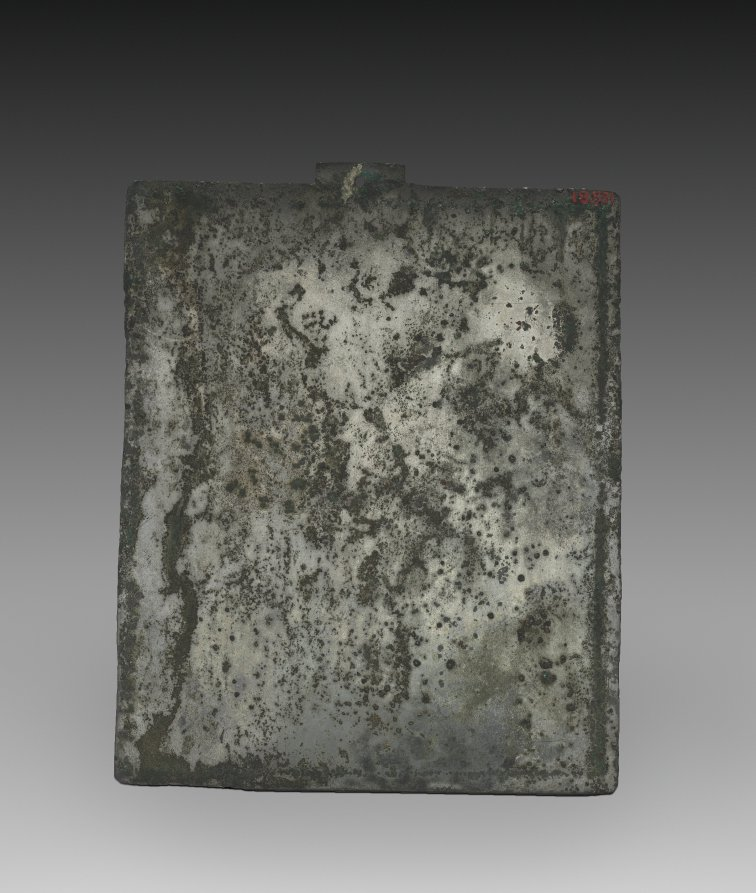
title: Mirror with the Image of Avalokitesvara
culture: Korea, Joseon dynasty (1392–1910)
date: early 1900s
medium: bronze with incised Buddhist designs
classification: Metalwork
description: Mirrors, along with swords and jade, were among the most important symbols of power. It is thought that mirrors held power through their ability to catch and reflect light. This rare trapezoid-shaped example is engraved with an image of the Avalokitesvara, Bodhisattva of Compassion and was used as a part of Buddhist rituals.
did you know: Due to its origin as an important tool in religion and politics, mirrors are often mentioned in many Korean proverbs that warn certain behaviors.